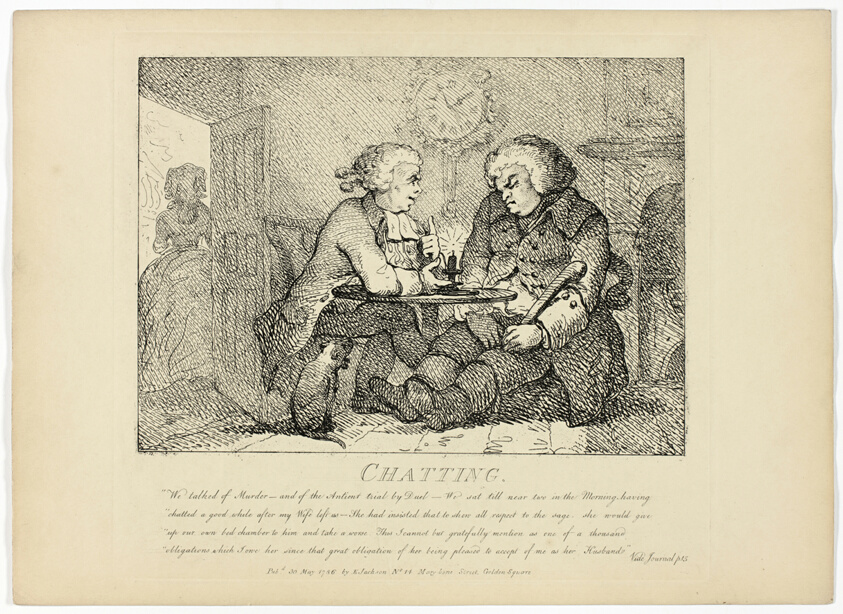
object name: Print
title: Chatting, from Boswell's Tour of the Hebrides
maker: Thomas Rowlandson (English, 1756-1827)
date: 1786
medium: Etching on paper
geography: England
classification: etching; print; prints and drawing